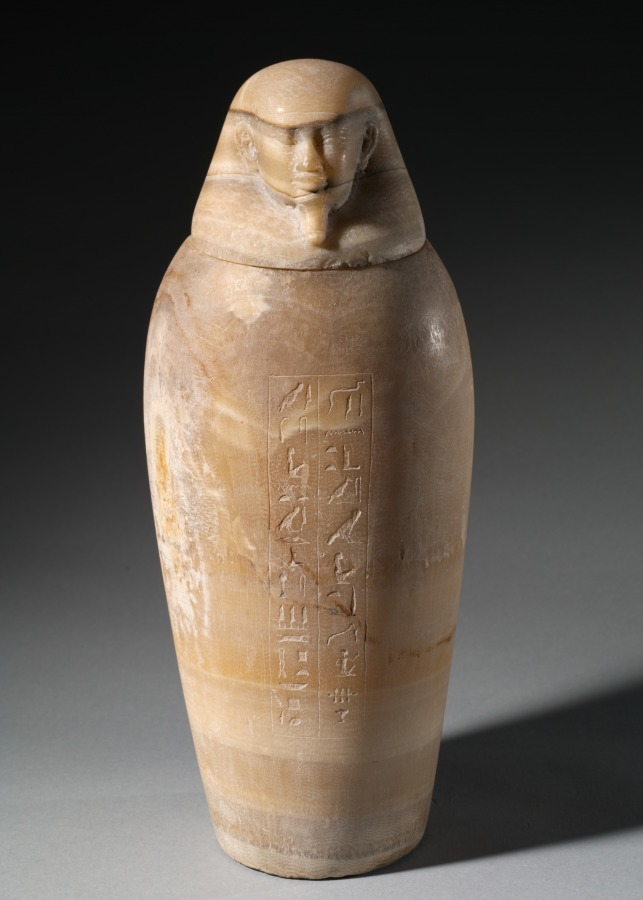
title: Canopic Jar with Man's Head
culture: Egypt, Late period (715–332 BCE), Dynasty 26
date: 664–525 BCE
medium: travertine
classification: Funerary Equipment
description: In the process of mummification, the liver, lungs, stomach, and intestines were removed, separately embalmed, and stored in specialized jars known as canopic jars (after a sailor in Greek mythology, who died at the town of Canopus in the Nile Delta and was worshipped there in the form of a human-headed jar). Each organ was identified with one of four funerary deities collectively known as the Sons of Horus: the liver with Imsety (man's head), the lungs with Hapy (baboon's head), the stomach with Duamutef (jackal's head), and the intestines with Qebehsenuef (falcon's head). It was their duty to protect the deceased and restore to him his body parts in the hereafter.